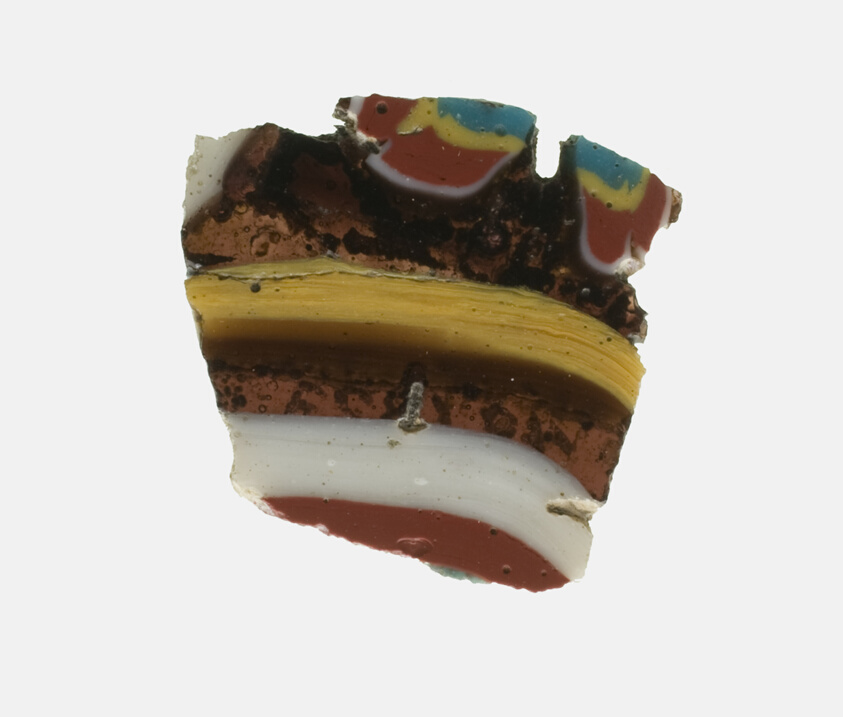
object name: Decorative Arts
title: Fragment of a Plaque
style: roman (ancient, style or period), ancient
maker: Roman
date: 1st century BCE–1st century CE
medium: Glass, mosaic glass technique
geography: Italy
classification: glass; inlay; ancient art; decorative arts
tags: decoration